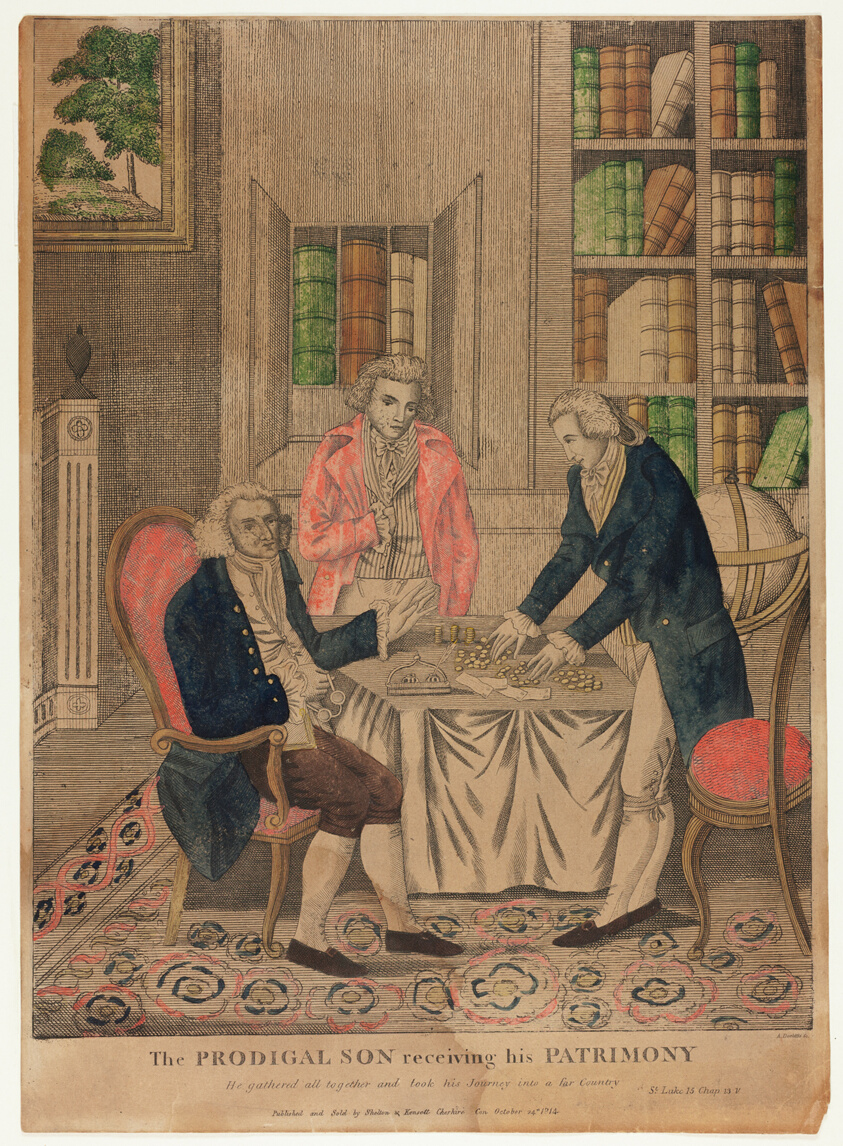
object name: Print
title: The Prodigal Son Receiving His Patrimony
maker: Amos Doolittle (American, 1754-1832)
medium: Hand-colored engraving on paper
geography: United States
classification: wood engraving; print; prints and drawing